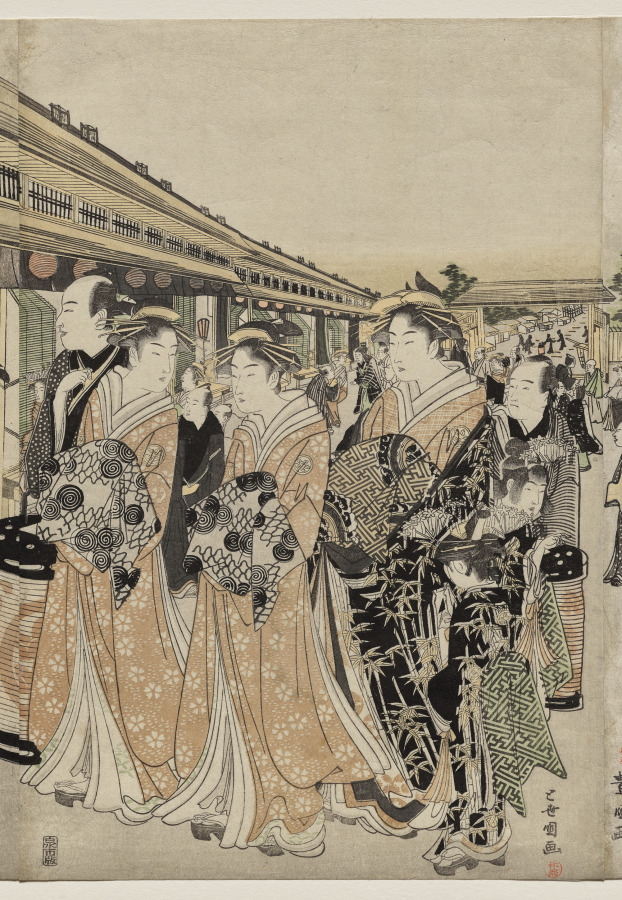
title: Courtesans Promenading on the Nakanochō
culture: Japan, Edo period (1615–1868)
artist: Utagawa Toyokuni (Japanese, 1769–1825)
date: c. 1790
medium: One of a triptych of color woodblock prints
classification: Print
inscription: Signature: Toyokuni ga Publisher: Izumiya Ichibei (Senichi han)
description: Nakanochō was the main street in Yoshiwara, a famous walled pleasure district that housed as many as 4,000 courtesans. In the early evening, elaborately dressed courtesans accompanied by attendants promenaded on the central thoroughfare, as in this scene. The open buildings with shop curtains hanging from their eaves are teahouses, establishments where men could arrange appointments with courtesans of the more prestigious brothels.